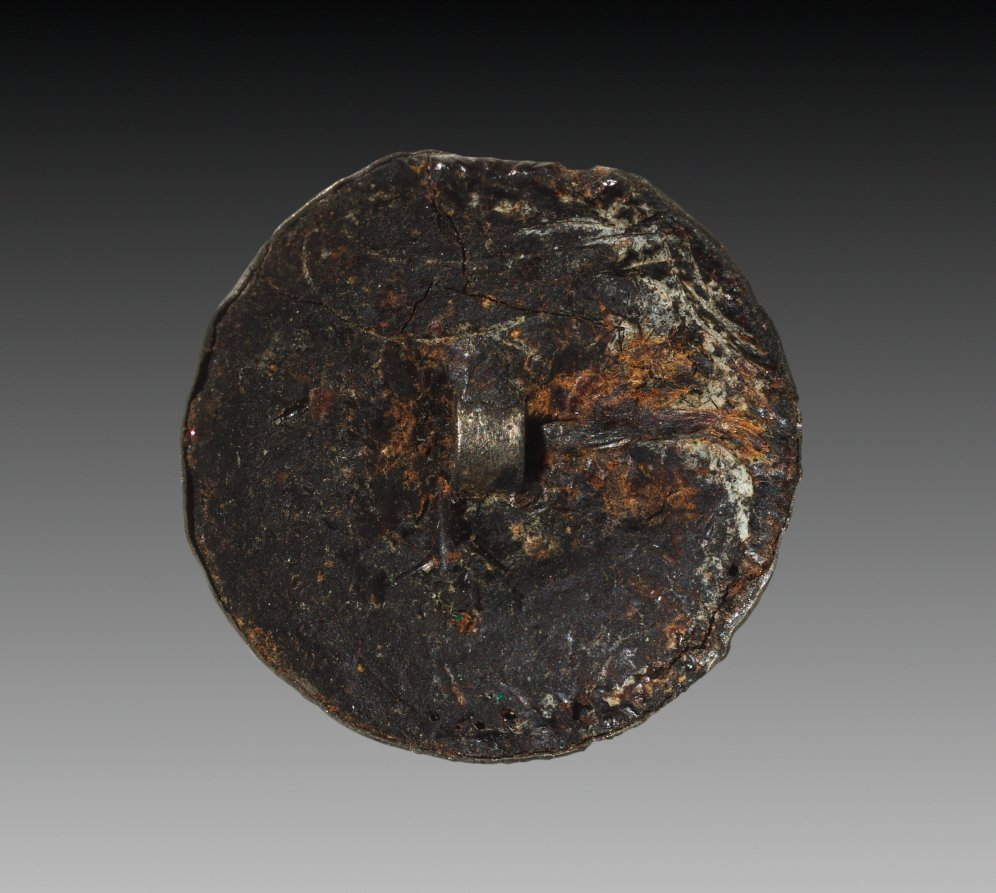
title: Rosette for Wig Decoration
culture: Egypt, Middle Kingdom (2040–1648 BCE), Dynasty 12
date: 1980–1801 BCE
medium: silver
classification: Jewelry